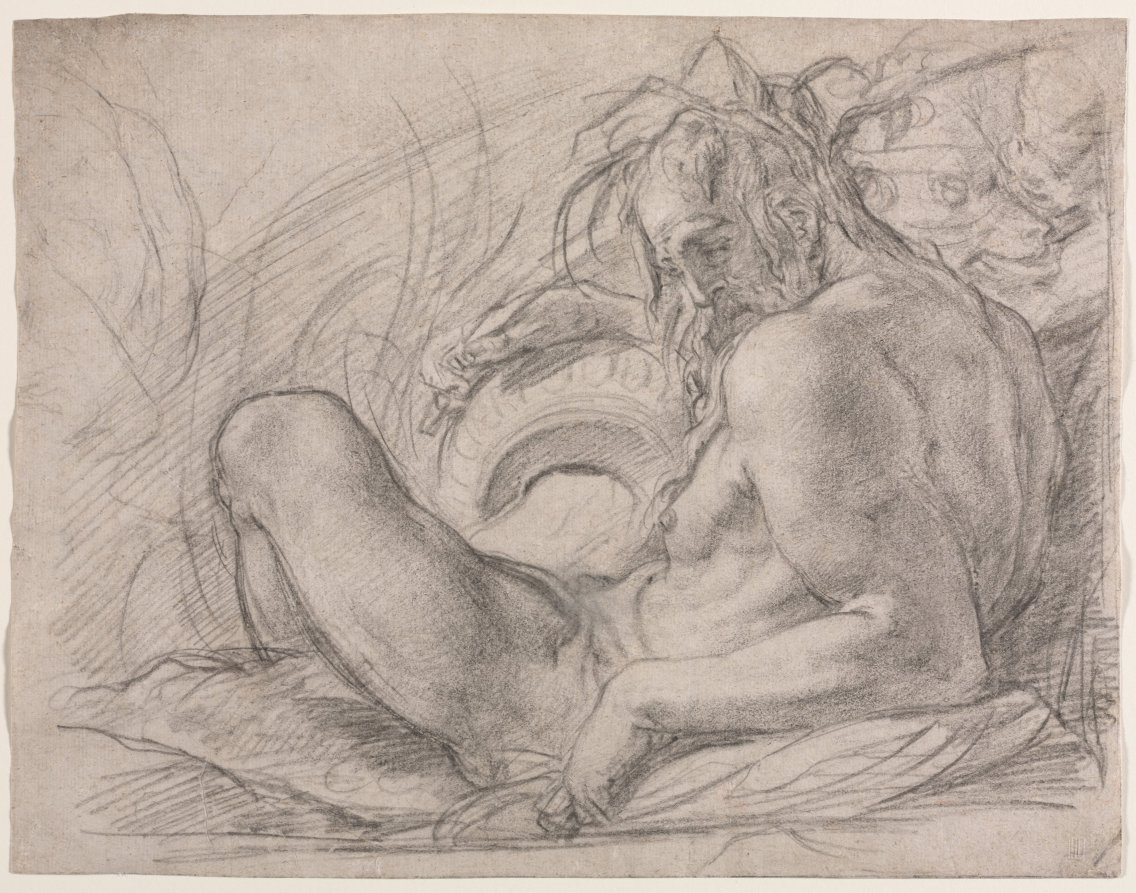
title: The River God Tiber (Study for a fresco, Miracle of the Snow, or the Foundation of Santa Maria Maggiore, Rome in the Canigiani chapel of S. Felicita, Florence)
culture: Italy, 16th century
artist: Bernardino Poccetti (Italian, 1548–1612)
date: 1589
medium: black chalk on antique laid paper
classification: Drawing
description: Since ancient times, artists have depicted river gods as reclining bearded men, often holding or leaning on a large urn pouring water. This example, a preparatory sketch for a painting, personifies the Tiber River, which plays a role in Rome’s legendary origins. Romulus, the founder of Rome, and his twin brother, Remus, were abandoned as infants at the river, where they were rescued by a she-wolf. Poccetti lightly sketched the animal’s head behind the river god along with the face of Romulus or Remus.